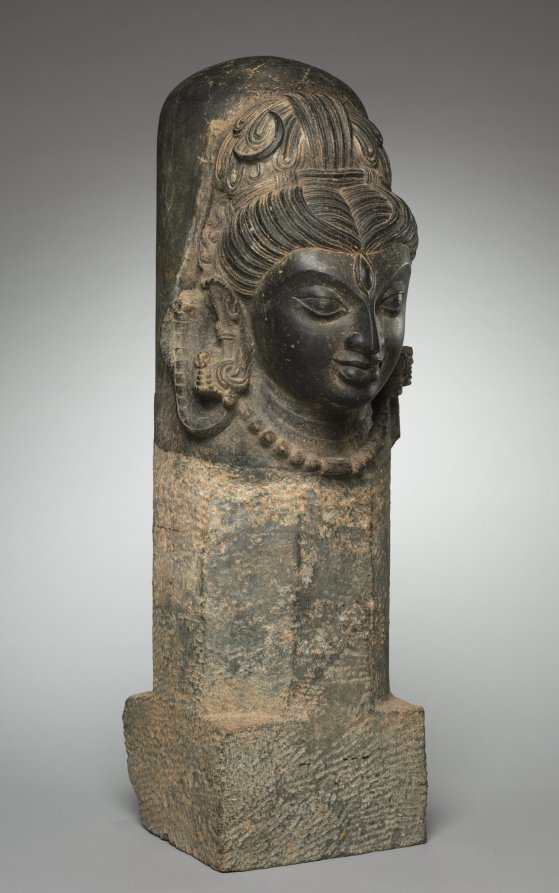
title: One-Faced Linga (Ekamukhalinga)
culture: Eastern India, Bihar, Medieval period, Pala dynasty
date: 600s–700s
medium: chloritic schist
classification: Sculpture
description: The innermost sanctum of a Hindu temple dedicated to Shiva is called a womb chamber in which a stylized phallus called a linga is installed. Together, the chamber and linga represent the potentiality of creation. Artists depict the first stage of creation by a face emerging from the phallus, which embodies one aspect of Shiva. This face is of a powerful yogi, with long matted locks adorned with a crescent moon. He has a penetrating gaze with all three of his eyes. This icon would have been accessed primarily by Brahmin priests who would perform rituals honoring Shiva as the ultimate creator of the world.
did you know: Some lingas have four faces that indicate a more advanced stage of creation.